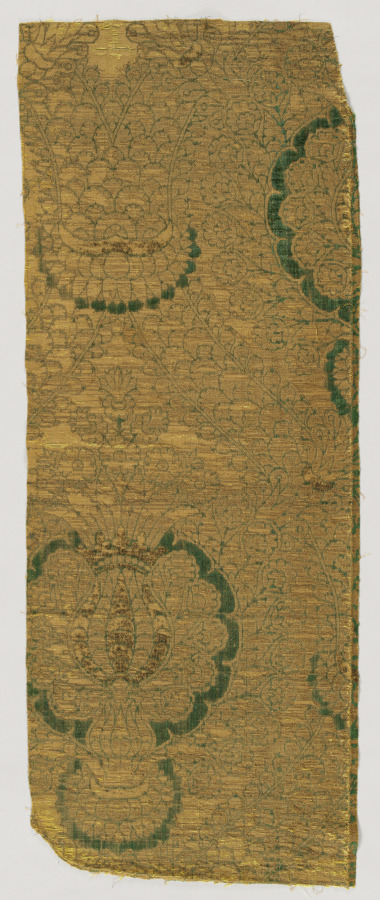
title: Velvet Fragments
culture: Spain, early 16th century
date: early 16th century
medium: velvet (cut, voided, and brocaded): silk and gold thread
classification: Velvet